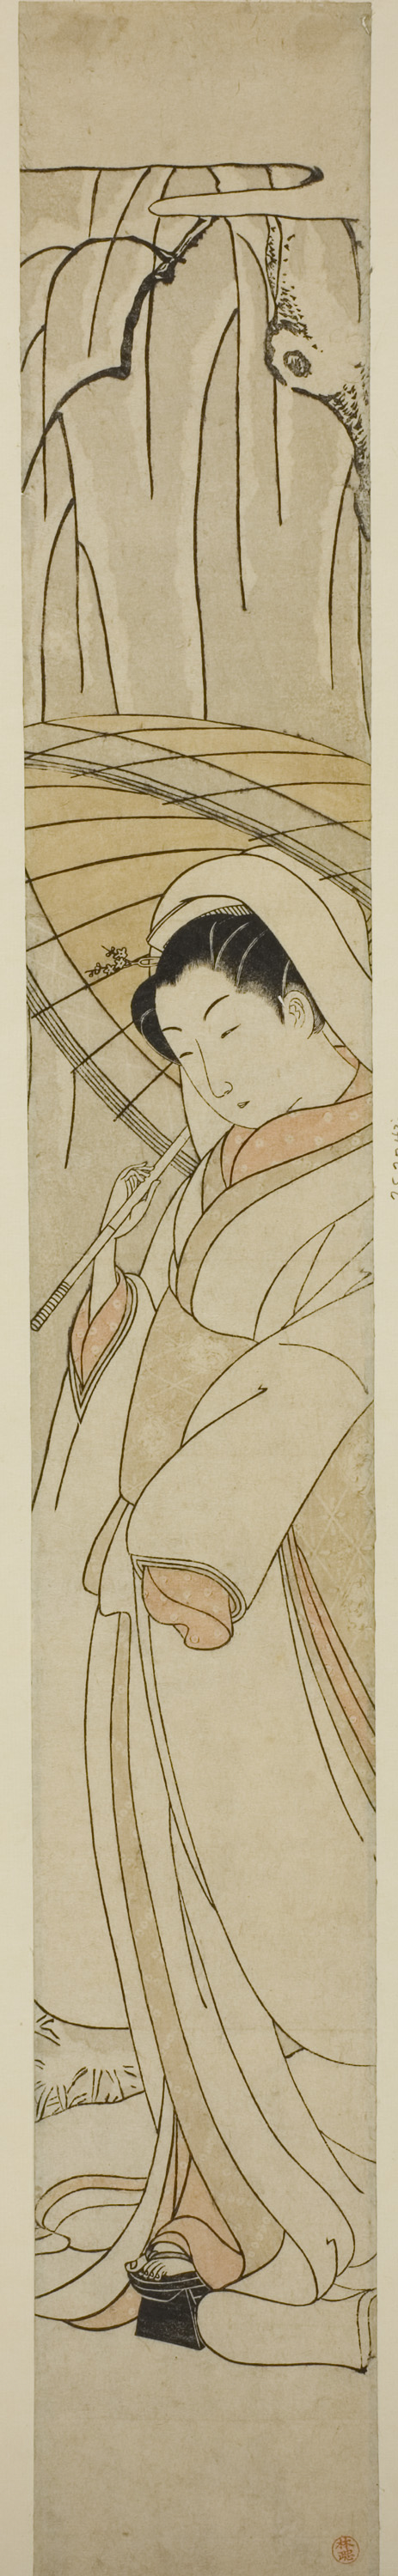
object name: Print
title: The Heron Maiden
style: Japanese (culture or style)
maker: Suzuki Harunobu 鈴木 春信; Japanese, 1725 (?)-1770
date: c. 1766/67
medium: Color woodblock print; hashira-e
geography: Japan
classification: woodblock print; print; asian art